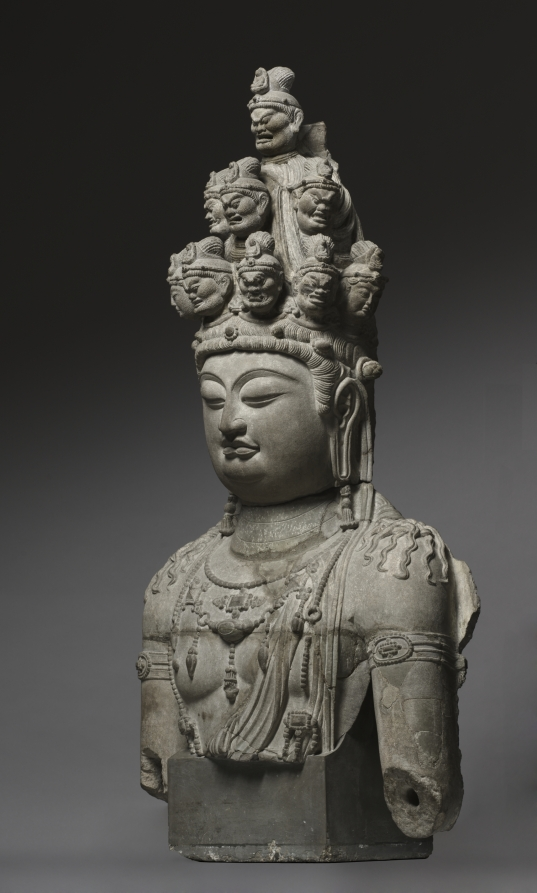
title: Eleven-Headed Guanyin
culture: China, Tang dynasty (618-907)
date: early 700s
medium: gray sandstone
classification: Sculpture